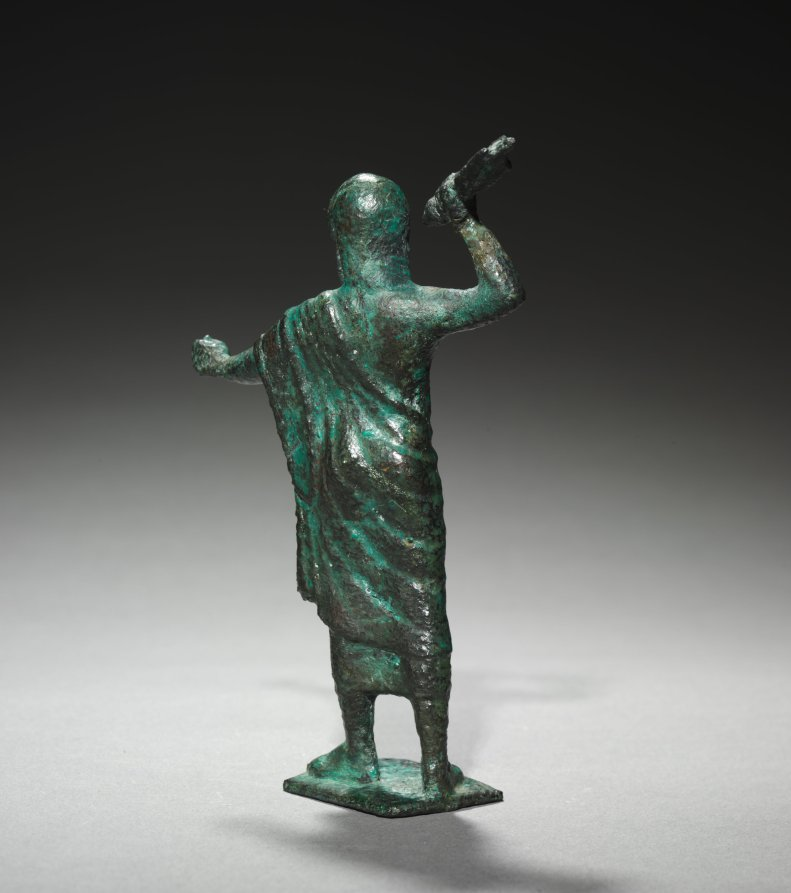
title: Statuette of Tinia (Zeus)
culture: Etruscan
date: c. 500 BCE, perhaps with modern patina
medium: bronze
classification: Sculpture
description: Tinia, the most powerful god in the Etruscan pantheon, often appears with a thunderbolt, the same attribute associated with Zeus and Jupiter in Greek and Roman religion and myth. The outstretched left hand may once have held a scepter. Although the figure finds numerous parallels among other Etruscan bronzes of the late 500s and early 400s BC, its surface is oddly rough and mottled with spots, perhaps the result of early modern treatment or coating meant to protect or improve its appearance. A 2001 analysis of the bronze composition showed results consistent with other ancient Etruscan alloys.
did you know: A break to the right wrist has been repaired with a dowel.